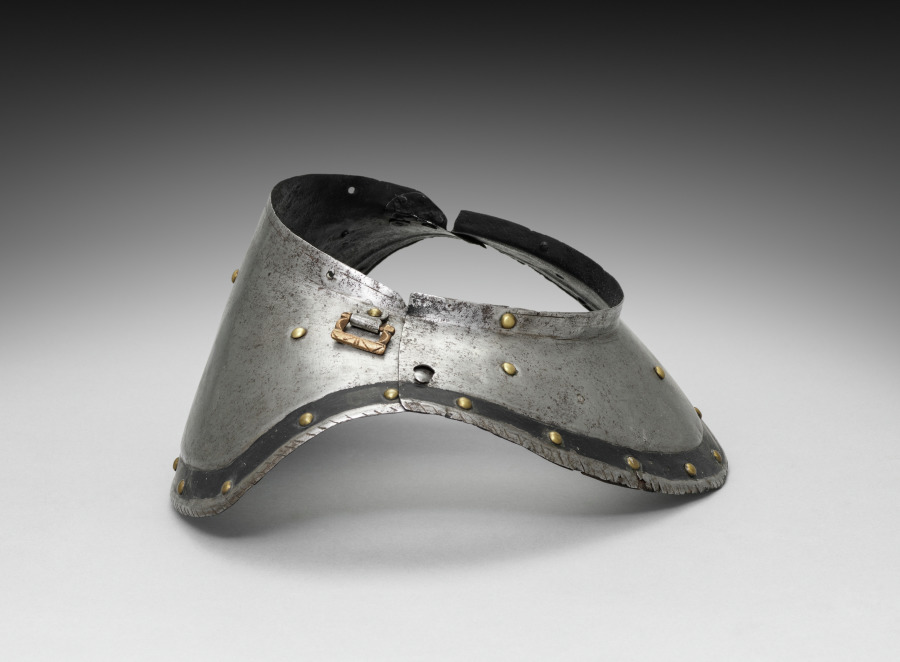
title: Colletin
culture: Germany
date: c.1550–1570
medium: iron, steel, leather and brass rivets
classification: Arms and Armor